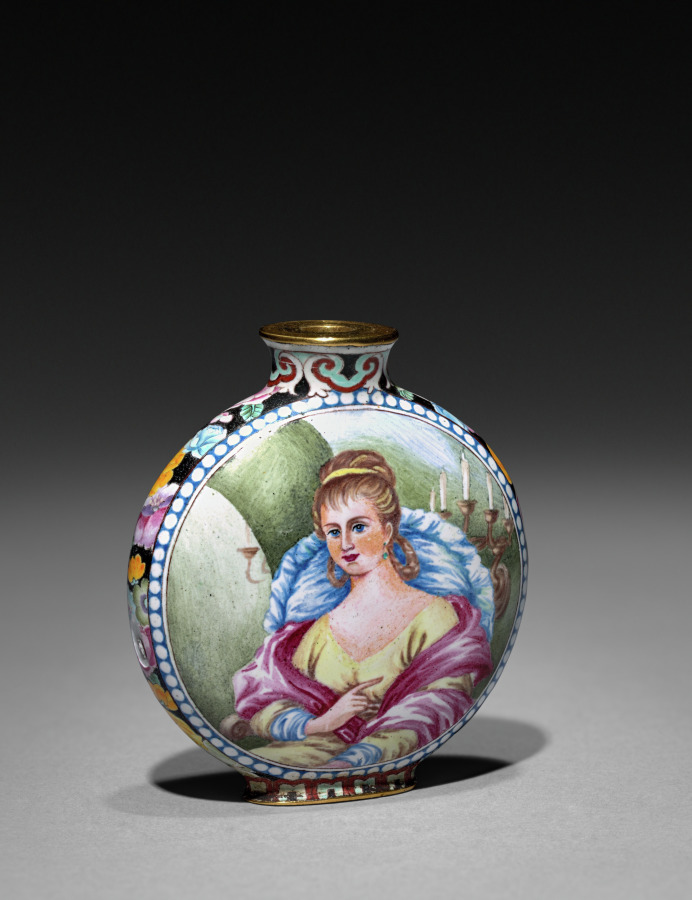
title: Snuff Bottle with European Figures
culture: China, Qing dynasty (1644-1911), Qianlong mark and reign (1736-95)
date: 1736–95 or later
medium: painted enamel on copper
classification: Enamel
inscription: 乾隆年製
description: Snuff bottles were introduced from Europe to China around the 1700s to hold portable snuff or medicine.